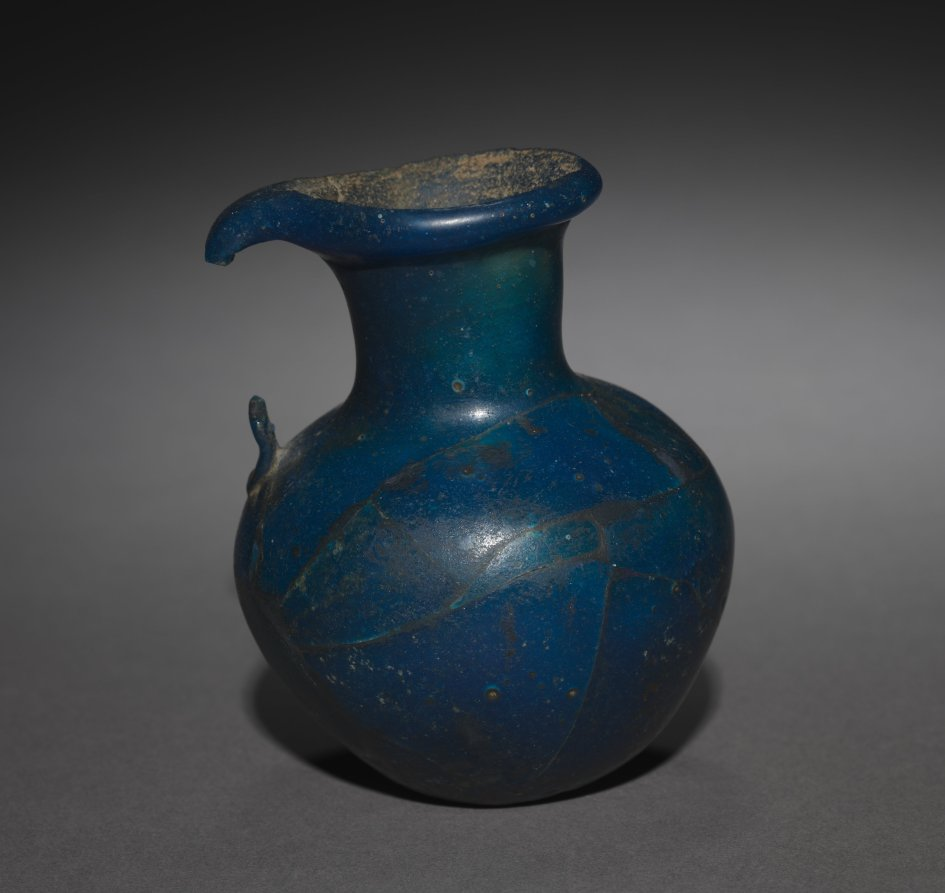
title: Long-Necked Flask with Strap Handle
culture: Egypt, New Kingdom (1540–1069 BCE), Dynasty 18, reign of Amenhotep III (1390–1352 BCE) or later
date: 1391–1353 BCE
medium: glass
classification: Vessels